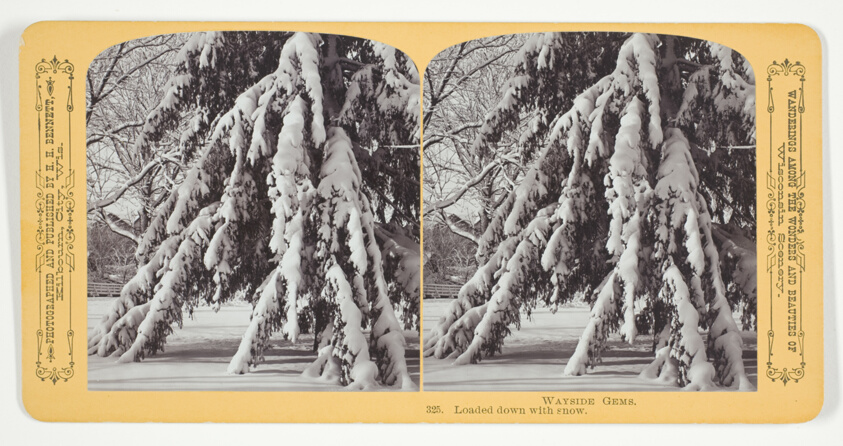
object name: Photograph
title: Loaded down with snow, No. 325 from the series "Wayside Gems"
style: 19th century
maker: Henry Hamilton Bennett (American, born Canada, 1843-1908)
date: 1870/89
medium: Albumen print, stereo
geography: Wisconsin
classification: photography; photograph; albumen silver print; stereograph (albumen)